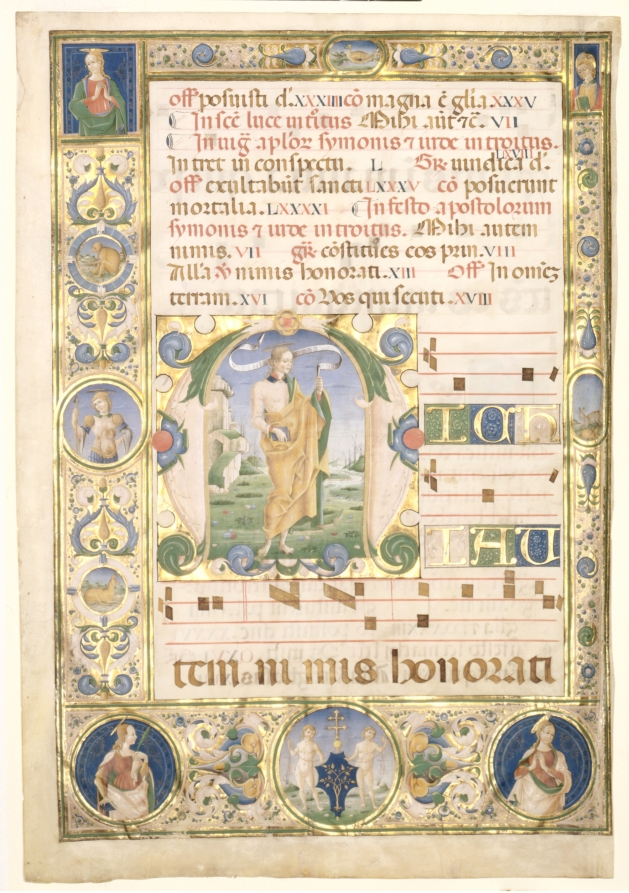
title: Leaf from a Gradual: Initial (M) with St. Andrew (recto)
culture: Italy, Ferrara, 15th century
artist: Jacopo Filippo d' Argenta (Italian, 1501)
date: c. 1480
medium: ink, tempera, and gold on parchment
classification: Manuscript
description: This leaf was excised from a volume of a large set of choral books known to have been commissioned by Bartolomeo delle Rovere for Ferrara Cathedral. Delle Rovere, nephew of Pope Sixtus IV, was the Bishop of Ferrara from 1474 to 1494 and his arms appear in the rondel at the bottom of the page-a shield bearing an oak tree (rovere in Italian) surmounted by a patriarchal cross, the symbol of his rank and authority. Payment records indicate that Argenta worked on the choir books for Ferrara Cathedral from 1478 to 1486. The initial M introduces the chant for the Introit (introduction) to the mass for the Feast of Saint Andrew, celebrated on November 30. This date also marks the beginning of the Advent season (leading to Christmas) in the liturgical calendar.